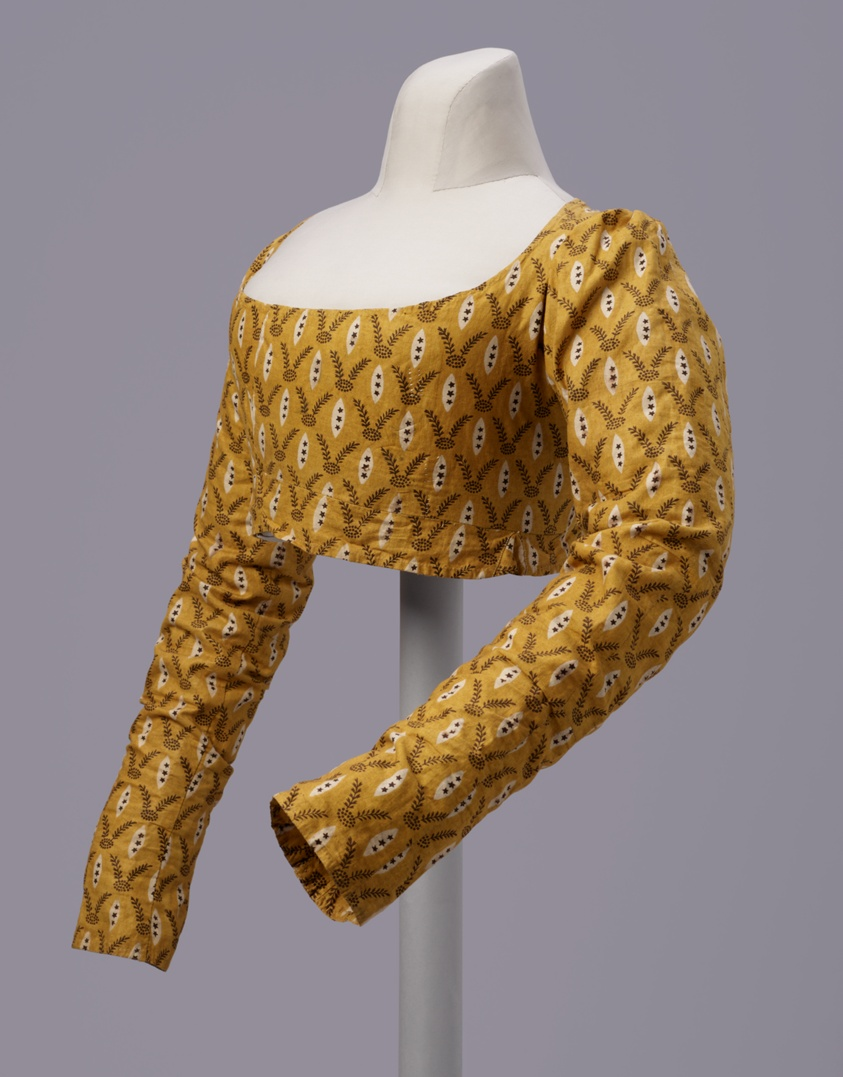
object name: Costume and Accessories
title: Woman's Spencer jacket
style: 17th Century, 18th Century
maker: France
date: c. 1800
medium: Cotton, plain weave, hand-block printed; cotton lining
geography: France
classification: dress (garment); costume - printed; costume - weaving; clothing; garment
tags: lattices, floral, stars, clothing